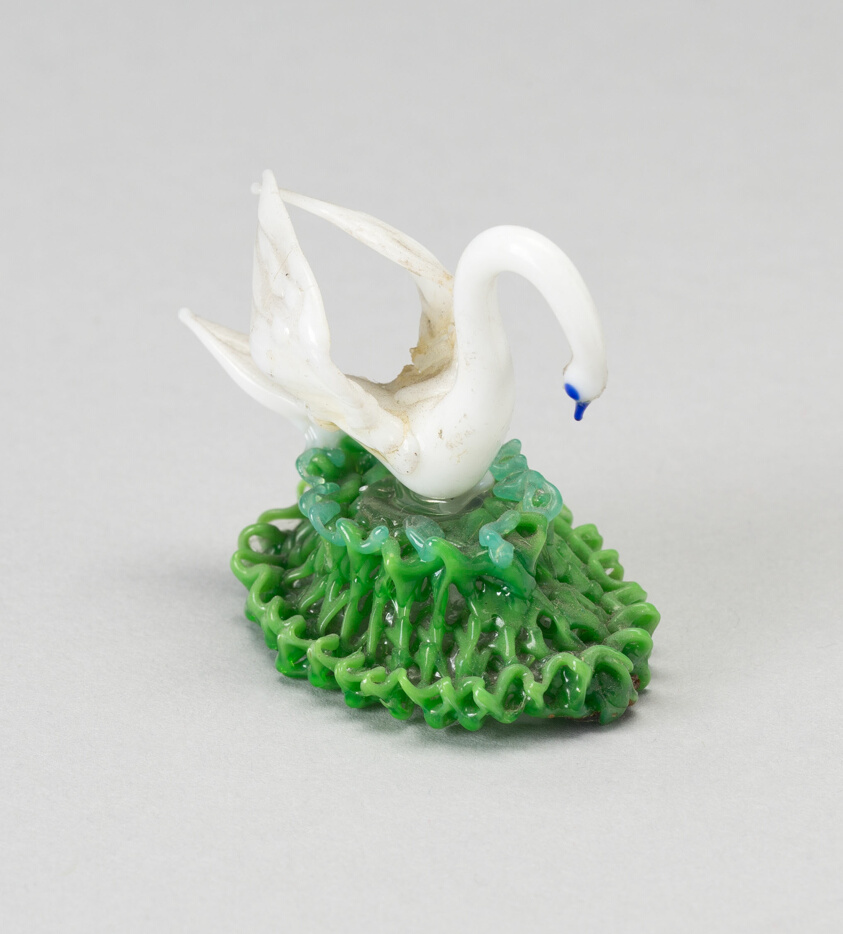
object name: Glass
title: Swan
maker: England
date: 19th century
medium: Blown glass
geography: England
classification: glass; european decorative arts